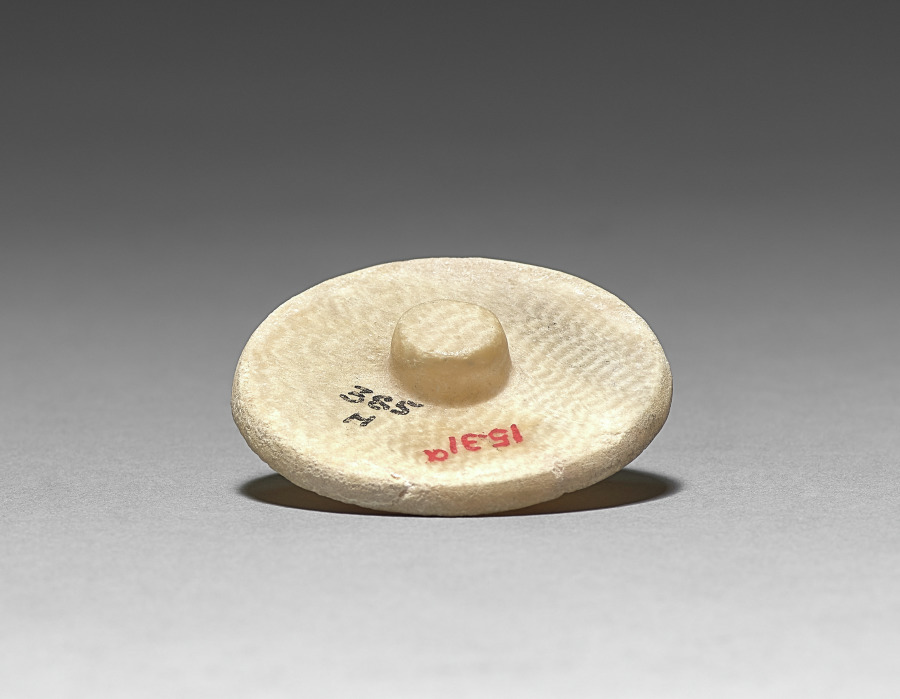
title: Kohl Jar with Lid (lid)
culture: Egypt, Middle Kingdom (2040–1648 BCE), Dynasty 12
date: 1980–1801 BCE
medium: travertine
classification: Vessels